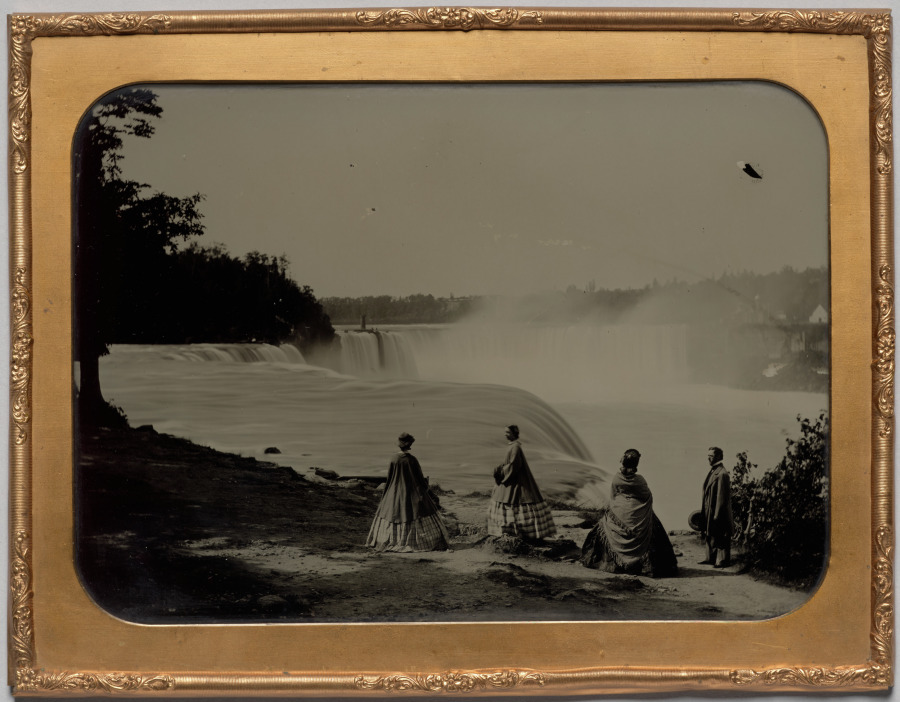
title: Niagara Falls with well-dressed group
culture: America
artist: Platt D. Babbitt (American, 1823–1879)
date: c. 1862–64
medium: ambrotype, whole plate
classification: Photograph